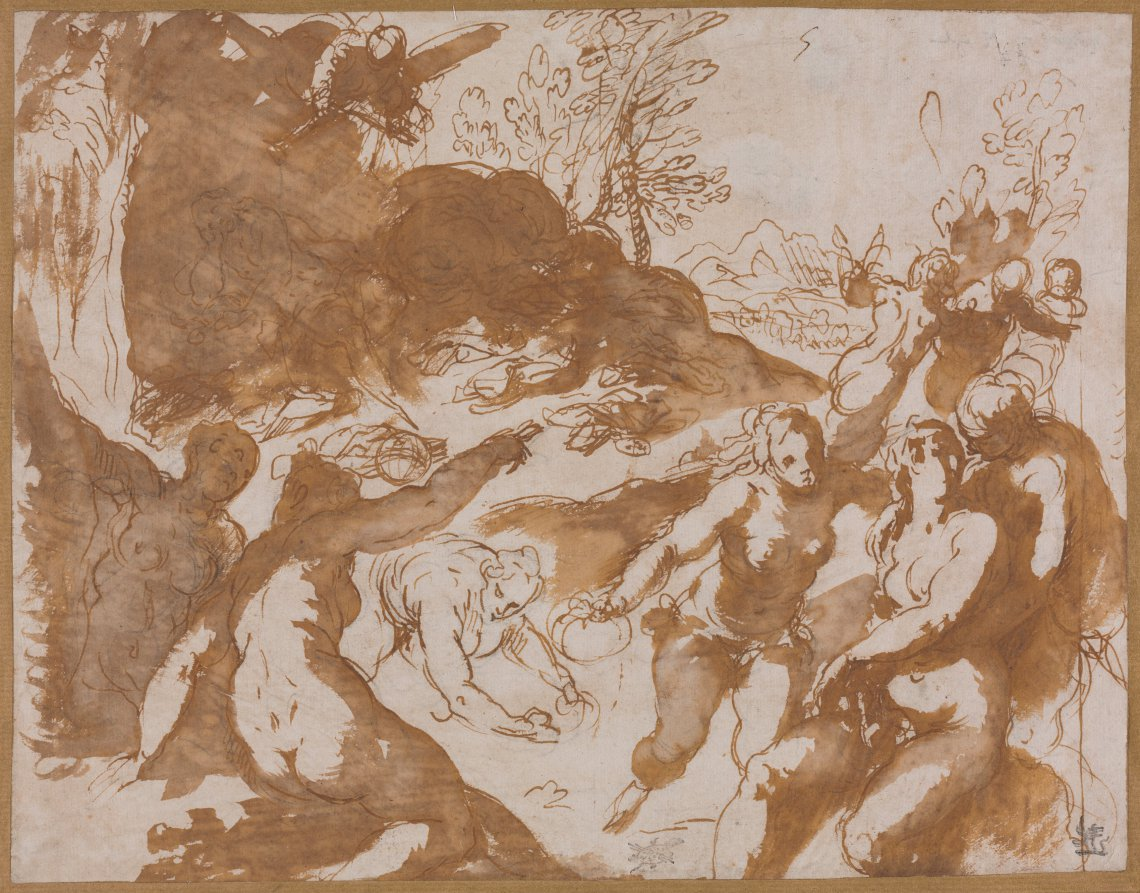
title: Apollo and the Muses Awakened by the Call of Fame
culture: Italy, 16th century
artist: Jacopo Palma il Giovane (Italian, c. 1548–1628)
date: 1590s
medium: pen and brown ink and brush and brown wash over graphite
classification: Drawing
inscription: RECTO OF SECONDARY SUPPORT, lower center, in brown ink: Palma giovan . ; VERSO OF SECONDARY SUPPORT, lower center, in graphite: Ex Coll: Jonathan Richardson ; lower center, in graphite: 23 [circled]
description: Here a barely visible Apollo, sleeping in the upper left background, and the nine muses are roused by the allegorical figure of Fame, who flies overhead with a trumpet. This dynamic scene signifies a reawakening of the arts. The loosely arranged clusters of figures and natural forms also suggest a harmonious relationship between humanity and the environment. This drawing, with its heavily subdued details and attention to the overall impact of contrast and design, is characteristic of Venetian draftsmanship in the late 1500s, and was valued by the small circle of Venetian intellectuals for whom Palma produced many similar mythological works.